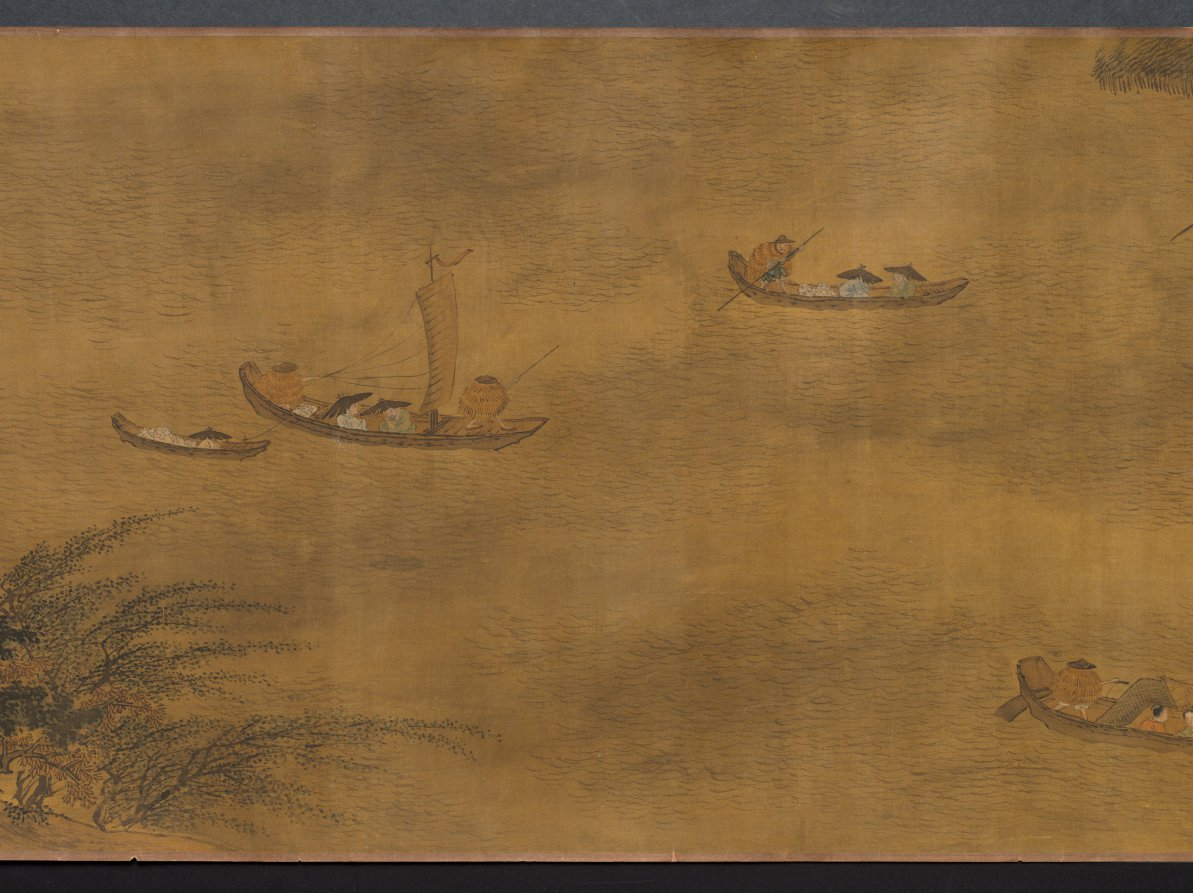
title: Returning to the Village in a Rainstorm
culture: China, Ming dynasty (1368–1644)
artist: Xie Shichen (Chinese, 1487–after 1567)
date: 1530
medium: Handscroll; ink and light color on silk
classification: Painting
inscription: 風雨歸村圖 嘉靖庚寅秋日樗仙謝時臣. [印] 謝時臣印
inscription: 3 additional seals unidentified.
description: This scroll depicts a wind- and rainswept landscape with figures in the countryside struggling against a late summer monsoon rainstorm. Such weather was familiar to residents of the lower Yangzi delta. Xie Shichen spent most of his life in the Suzhou area. Details of his career are scant, but his surviving works suggest that he made his living as a professional painter. This painting conveys drama and anecdotal observations, characteristic of Zhe school paintings, such as the one by Lü Wenying, CMA 1970.76.